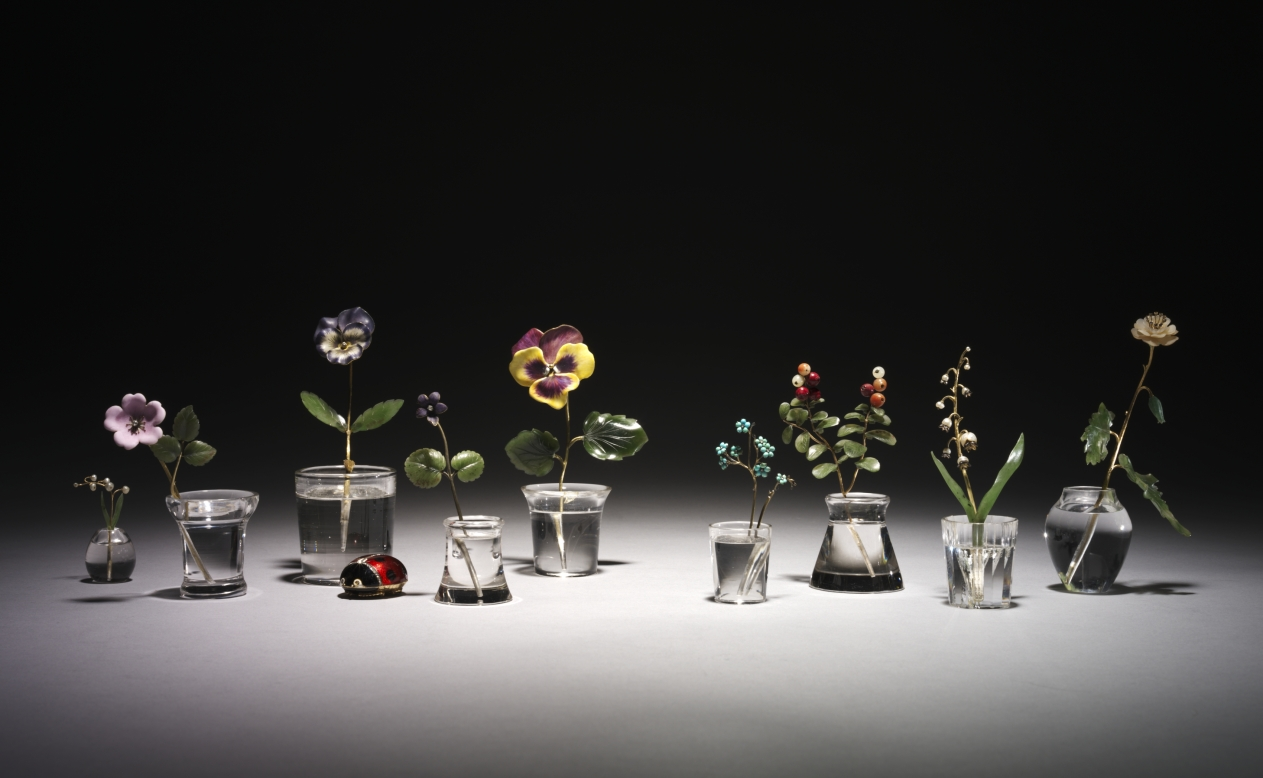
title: Flower Study of a Lowbush Cranberry or Lingonberry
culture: Russia, St. Petersburg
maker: House of Fabergé (Russian, 1842–1918)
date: c. 1885–1915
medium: chalcedony, jade, rock crystal, gold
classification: Miscellaneous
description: This flower study depicts a lowbush cranberry or lingonberry. To achieve a naturalistic effect of ripening fruit, Fabergé varied the coloring of the berries. Some are made of chalcedony in hues of milky white to represent unripe berries, while others appear in deep reddish agate to represent ripe ones. Fabergé’s inspiration for his flower studies is said to have come from the floral brooches of precious stones that were made in the 1700s for Catherine the Great as well as from the Japanese art of flower arranging, known as ikebana. Fabergé’s flower studies were given as intimate gifts to friends by the tsarina and others in the court. She also liked to take them around to wherever the imperial family was residing as a reminder of spring during the harsh Russian winters.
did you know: The stems of Fabergé’s flower studies are set into little basins carved from rock crystal to resemble pots of water.